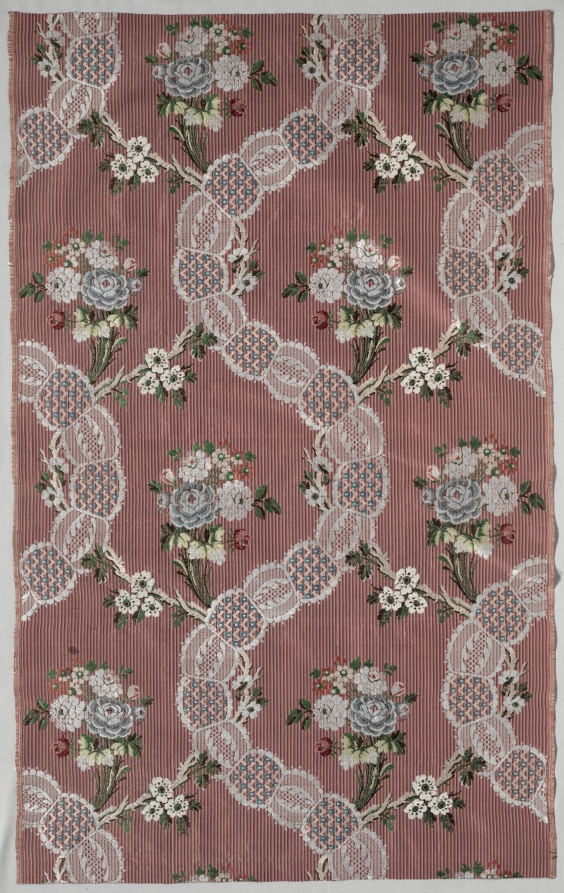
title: Length of Silk Brocade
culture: France, 18th century, Period of Louis XVI (1774-1793)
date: 1774–1793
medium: brocade, silk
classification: Textile